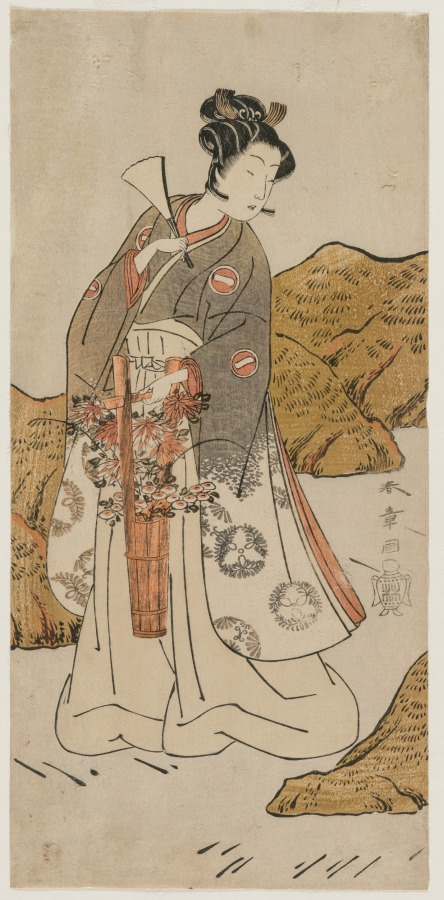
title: Ichikawa Monnosuke II as a Temple Page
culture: Japan, Edo period (1615–1868)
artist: Katsukawa Shunshō (Japanese, 1726–1792)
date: early 1770s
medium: color woodblock print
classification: Print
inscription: Signature: Shunsho ga Artist Seal: Hayashi jar seal